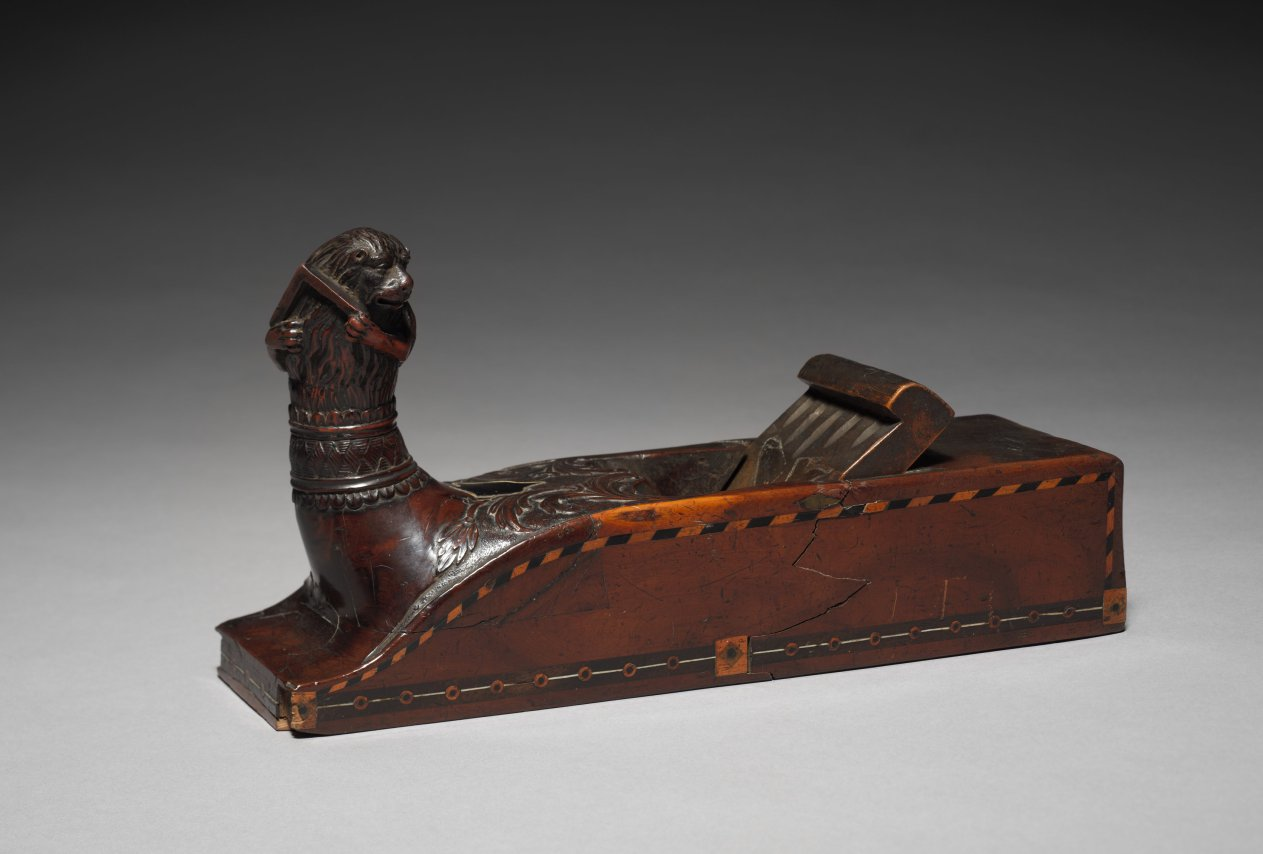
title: Carpenter's Plane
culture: Italy, late 17th century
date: late 1600s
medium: wood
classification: Tool